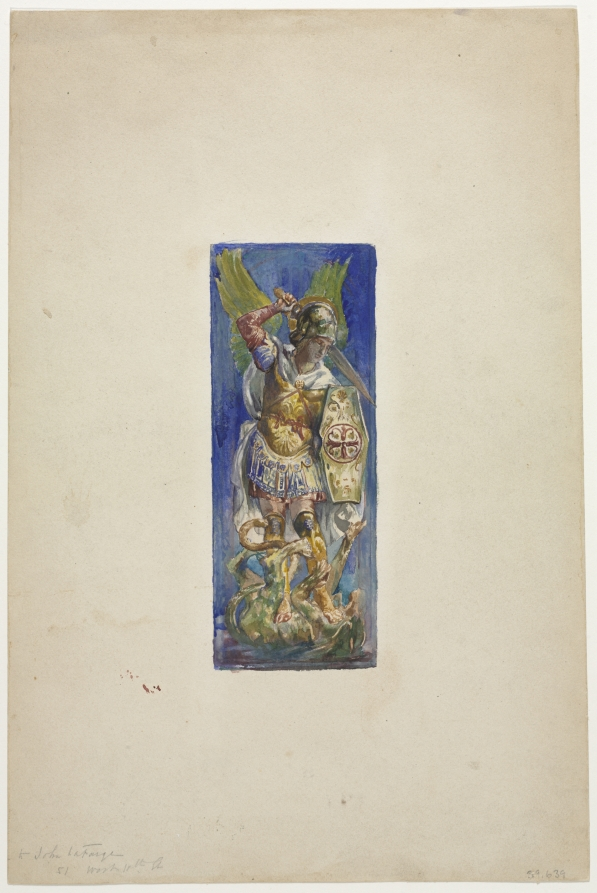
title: Design for Stained Glass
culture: America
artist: John La Farge (American, 1835–1910)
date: c. 1850–1910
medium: watercolor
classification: Drawing